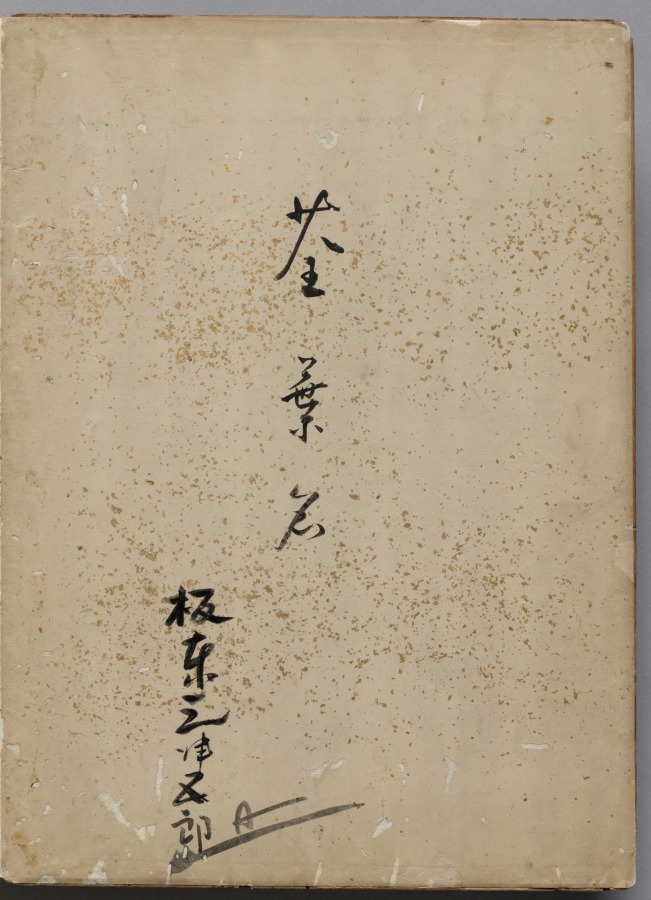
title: Leaf from Accordion-Style Album of Actor Portraits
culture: Japan, Edo period (1615–1868)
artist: Shōrakusai (Japanese)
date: c. 1790–1810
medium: leaf from accordion-style album; ink on paper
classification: Bound Volume